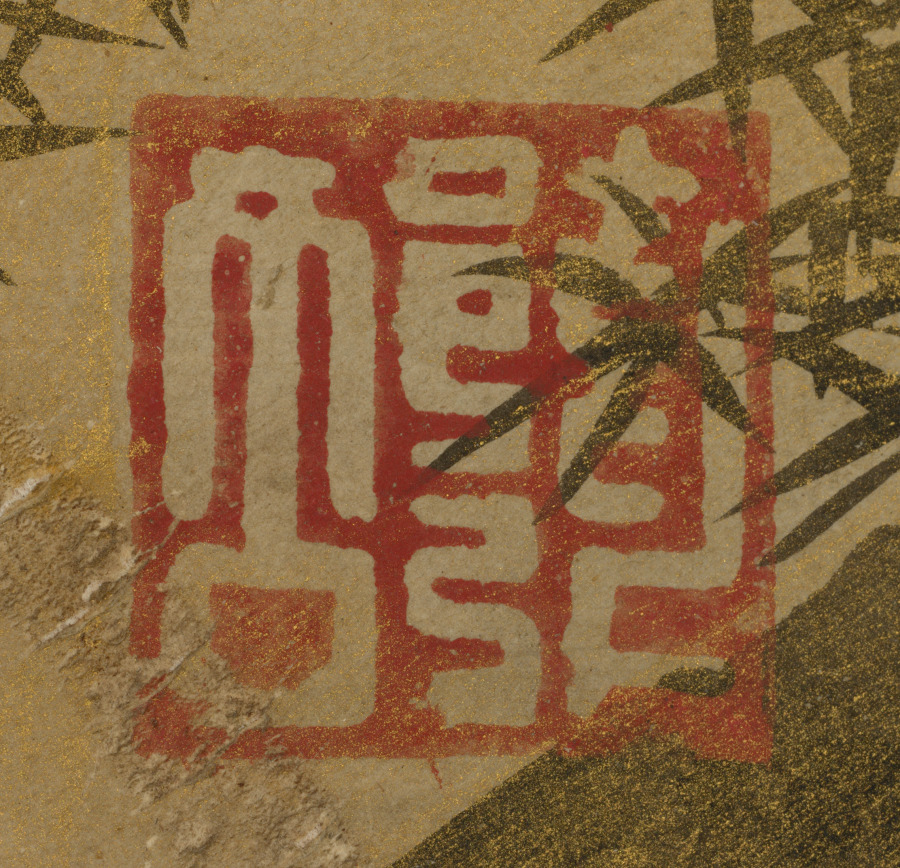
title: Hanshan and Shide (Kanzan and Jittoku)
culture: Japan, Muromachi period (1392–1573)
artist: Shikibu Terutada (Japanese, active mid-1500s)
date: mid-1500s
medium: Fan-shaped painting mounted as hanging scroll; ink and gold on paper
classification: Painting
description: These three fan-shaped paintings, now mounted as individual hanging scrolls, were once part of a set of 20 mounted on a folding screen. They portray the Chinese subjects, from left to right, of the scholar-official Pan Lang, Hanshan reciting his poetry to Shide, and a duck in flight above reeds. Pan Lang grew so fond of the mountain in his place of exile that when he was ordered back to the capital, he rode backward on his donkey so he could see it until it receded into the distance. Hanshan and Shide worked in the kitchen of a Zen monastery, but were actually reincarnations of the bodhisattvas Manjushri and Samantabhadra. The combination of a mandarin duck and reeds may have signified a level of attainment in Chinese civil service exams. All three paintings bear the seal of the Kantobased artist Shikibu Terutada. Shikibu was familiar with Kano school painting, but he also modeled his early style after that of the prominent Kanto-based Kenkō Shōkei (active about 1470–after 1523).